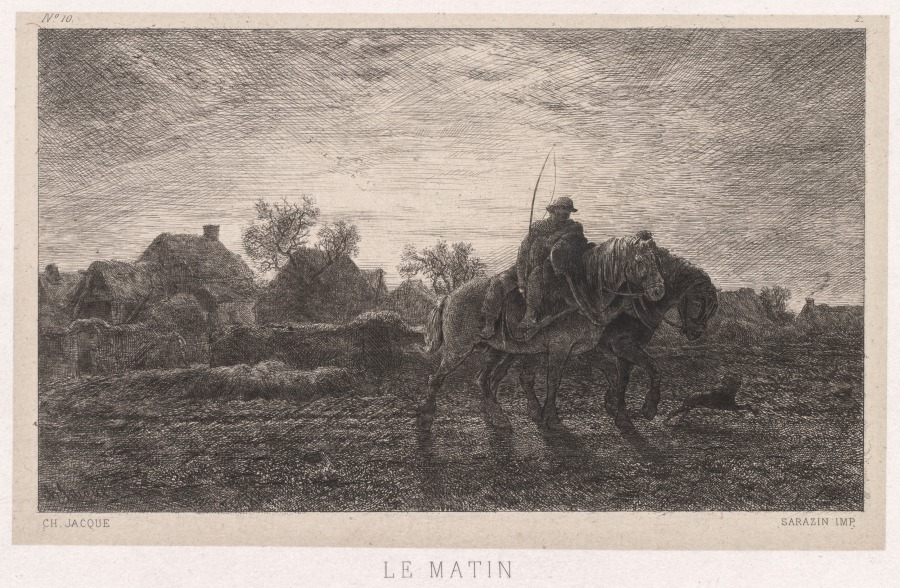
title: Morning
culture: France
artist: Charles-Émile Jacque (French, 1813–1894)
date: c. 1864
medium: etching, drypoint, and engraving on chine collé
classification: Print